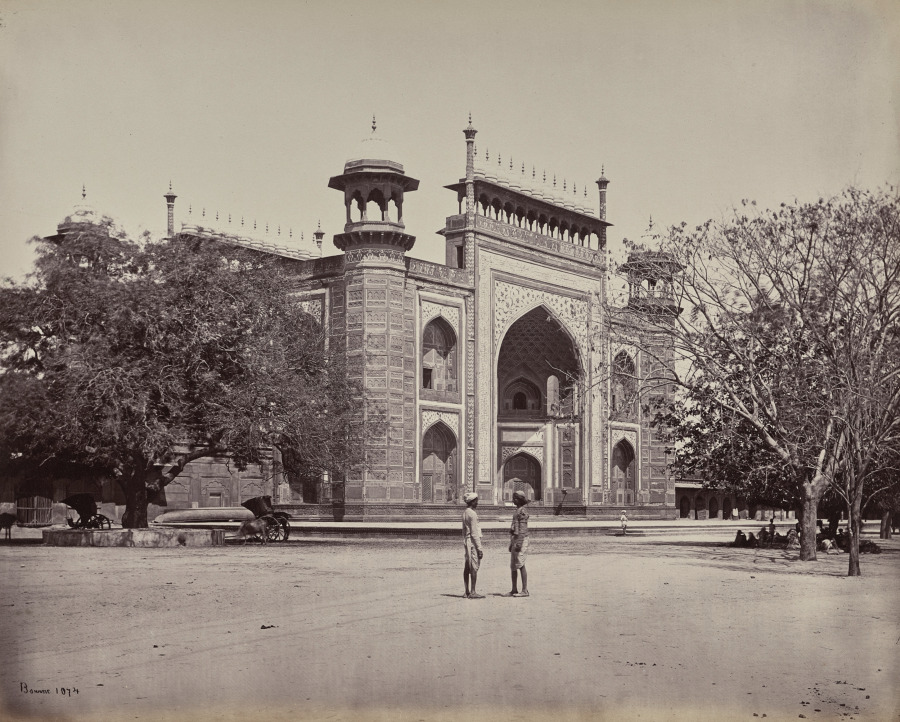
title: Agra. The Gateway of the Gardens Surrounding the Taj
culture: England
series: Photographs of Northern India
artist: Samuel Bourne (British, 1834–1912)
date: 1863–70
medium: albumen print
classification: Photograph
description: The 50 images in this album, all taken in the 1860s, move from the hill towns of the Himalayas down to cities including Lahore (now in Pakistan), Delhi, Lucknow, Agra, Benares (now Varansi), and Calcutta (now Kolkata). Architectural studies of major monuments offer valuable historical records of what sites such as the Taj Mahal and the imperial mosque of the Mughal emperors in Delhi looked like before twentieth-century restorations.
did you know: Samuel Bourne, the author of most the images in this album, was a banker in England before he moved to India to become a professional photographer.